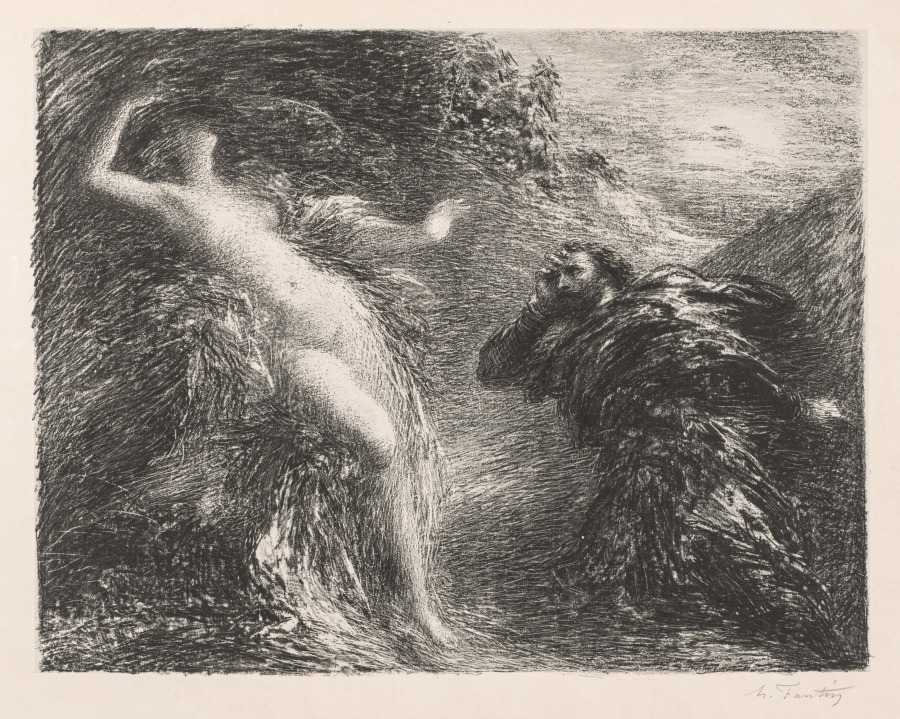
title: Manfred and Astarté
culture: France, 19th century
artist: Henri Fantin-Latour (French, 1836–1904)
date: 1892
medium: lithograph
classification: Print